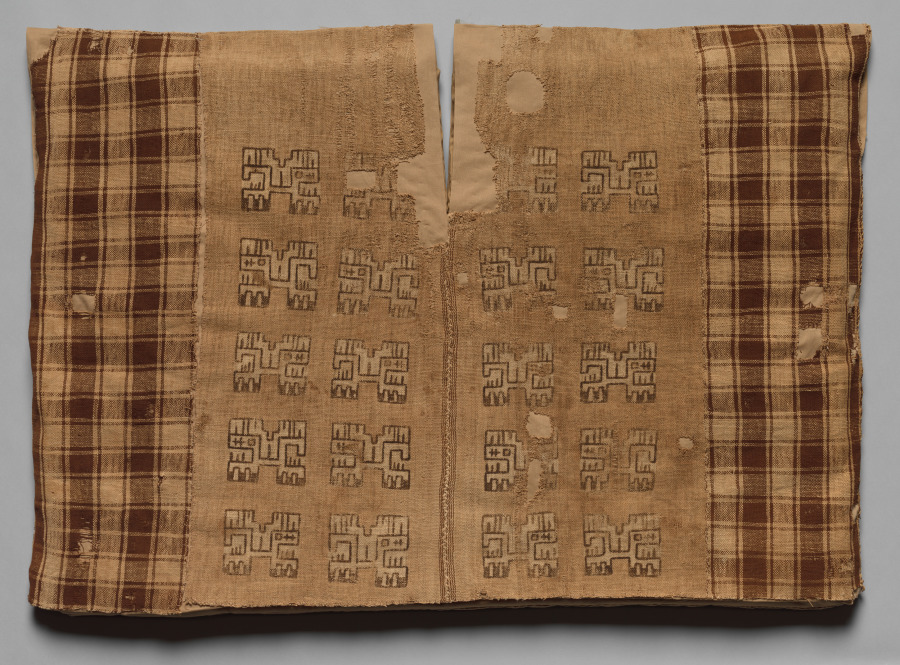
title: Tunic with Profile Animals and Checkerboards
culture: Peru, South Coast, Paracas or Nasca?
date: 410–540 CE (radiocarbon date, 93% probability)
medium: cotton; dye-patterned plain weave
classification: Textile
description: The imagery in the central field of this unique tunic—animals with long tails and three-toed feet—seems to have been created by painting a slurry-like material on the pale areas to protect them when the fabric was immersed in a bath that turned other areas light brown. Then the slurry was removed, revealing the pattern. The checkerboard areas at the sides, on the other hand, are woven with brown and cream-colored yarns. Specialists puzzle over the origins of the tunic, some attributing it to the Paracas (700 BCE–1 CE) and others to the Nasca (100 BCE–650 CE), who sprang from Paracas roots.